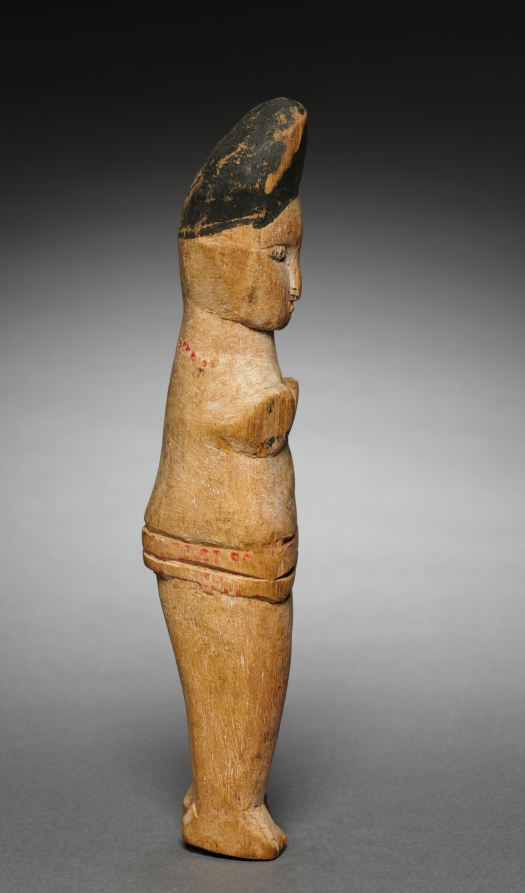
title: Doll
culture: Africa, West Africa, Nigeria, Ibibio style, unknown artist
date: 1900s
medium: Wood, kaolin, and paint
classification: Sculpture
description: Young Ibibio girls would play with dolls for fun. The dolls also took on deeper significance when a girl entered seclusion to go through preparations for adulthood and marriage, representing her future children and promoting her fertility. The kaolin (white clay) that once covered the figures' bodies has been worn off, possibly through handling during play. Thin lines represent uli, a kind of body painting. Upraised, foreshortened hands with open fingers were typical of dolls carved by Ibibio people from the Anang group.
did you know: Dolls like this were sold at markets where they were purchased as symbolic playthings for girls or souvenirs for tourists.